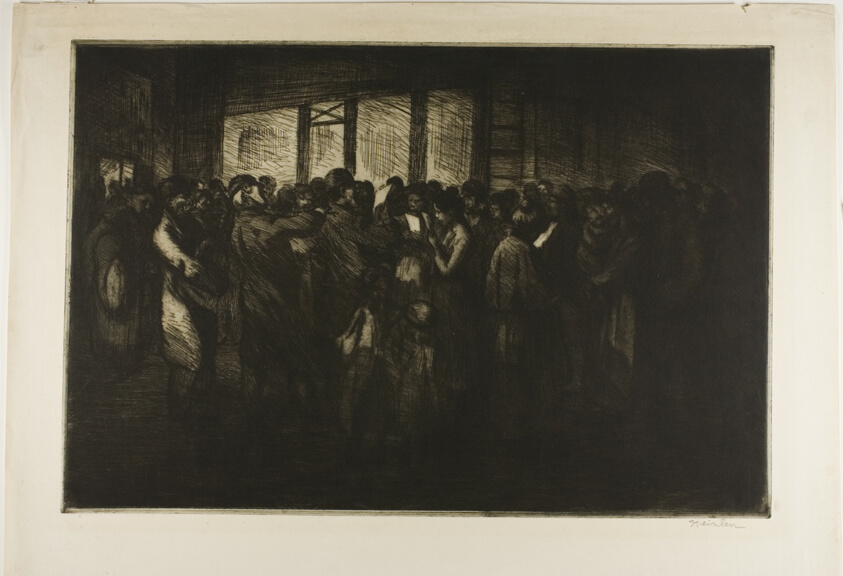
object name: Print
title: Street Singers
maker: Théophile-Alexandre Steinlen; French, born Switzerland, 1859-1923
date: 1902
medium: Etching and drypoint in warm black on ivory laid paper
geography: France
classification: etching; print; prints and drawing